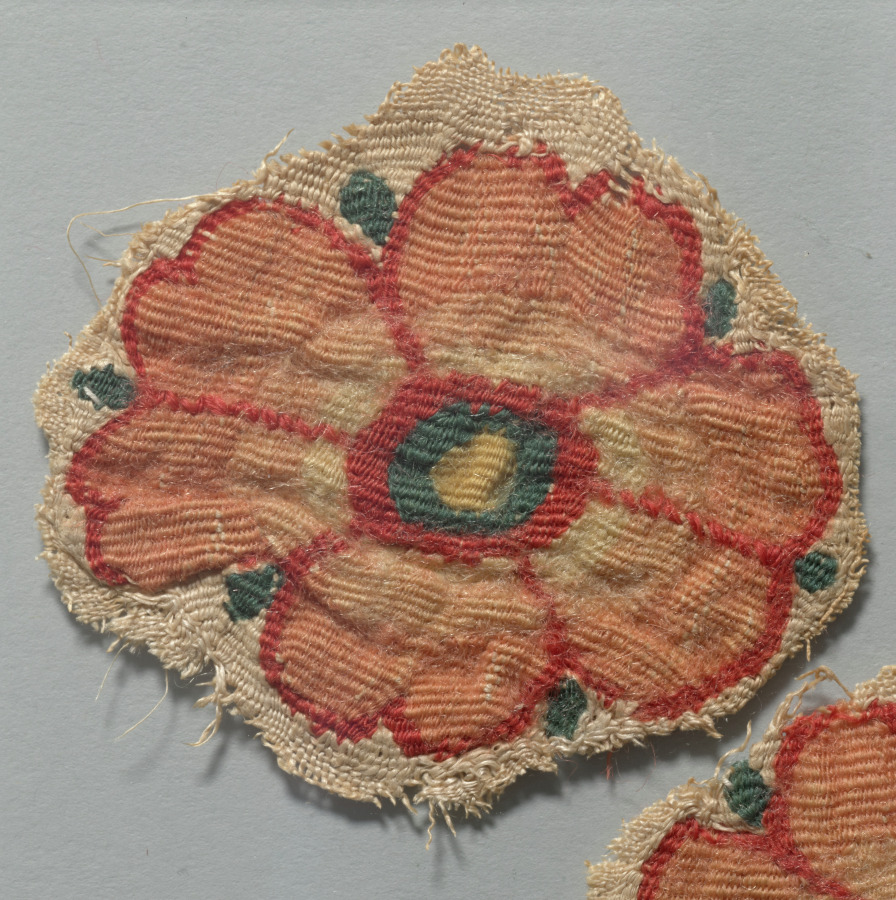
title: Fragments from a Curtain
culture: Egypt, Byzantine period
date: 300s–500s CE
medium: tapestry (originally inwoven in tabby ground, applied to plain tabby linen); linen and wool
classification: Textile